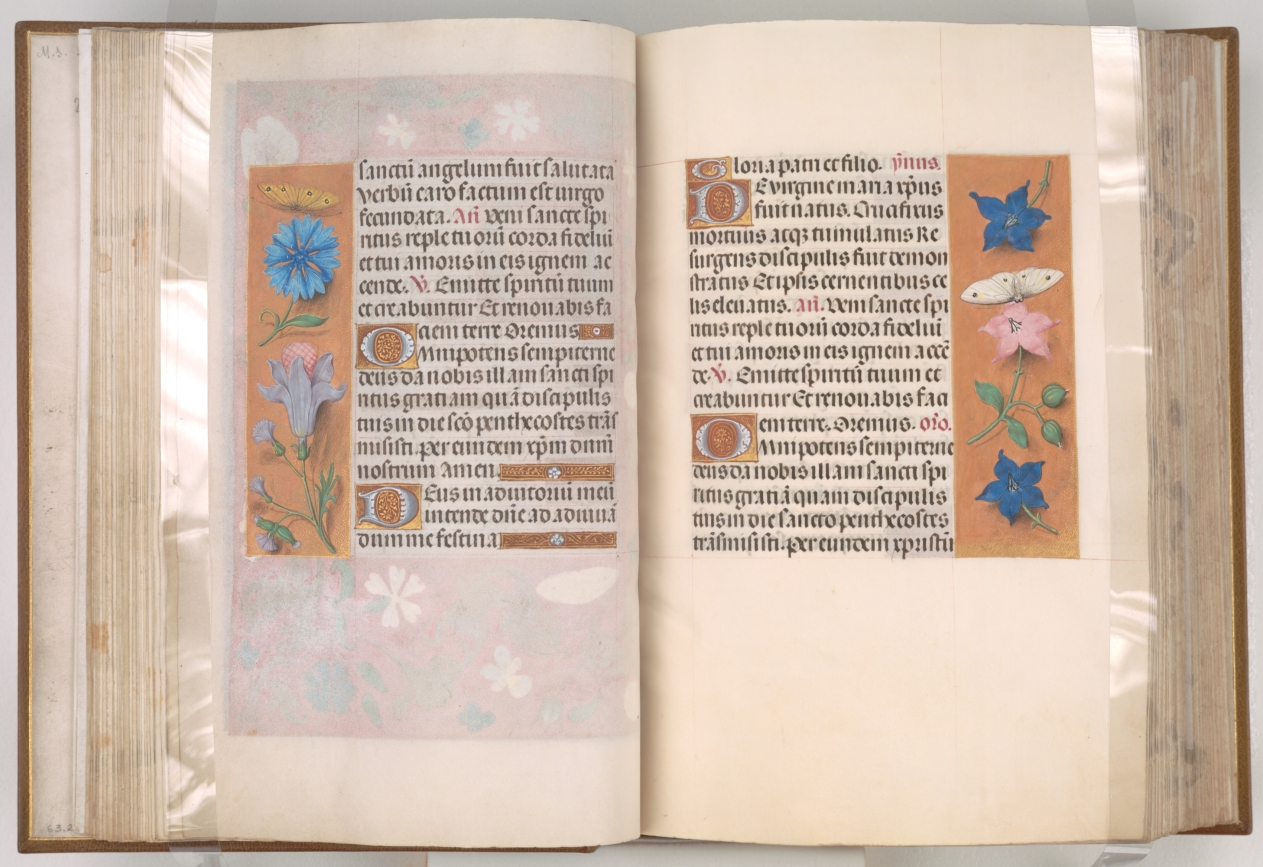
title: Hours of Queen Isabella the Catholic, Queen of Spain: Fol. 32v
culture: Flanders, Ghent and Bruges, late 15th century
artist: Master of the First Prayerbook of Maximillian (Flemish, c. 1444–1519)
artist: and Associates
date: c. 1500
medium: ink, tempera, and gold on vellum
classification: Bound Volume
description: A great lover of Flemish art, Queen Isabella treasured her many devotional books. This deluxe manuscript was created for her private devotions by highly organized and distinctly talented manuscript painters active in Ghent and Bruges. The Ghent-Bruges school represents the culmination of Flemish book painting, whose main features were the use of rich colors, illusionistic effects, a love of landscape, and a strong sense of visual narrative. Manuscripts produced by this circle of artists are renowned for their border decoration featuring a rich variety of realistically painted flowers, scrolling acanthus leaves, birds, and butterflies.